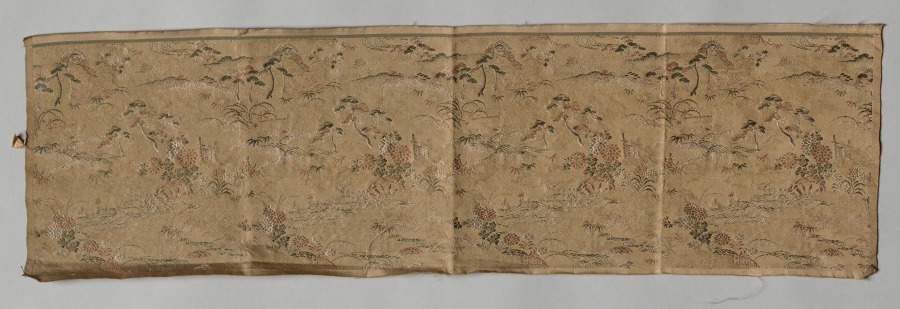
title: Textile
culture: Japan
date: late 1800s-early 1900s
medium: silk, metallic thread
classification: Textile